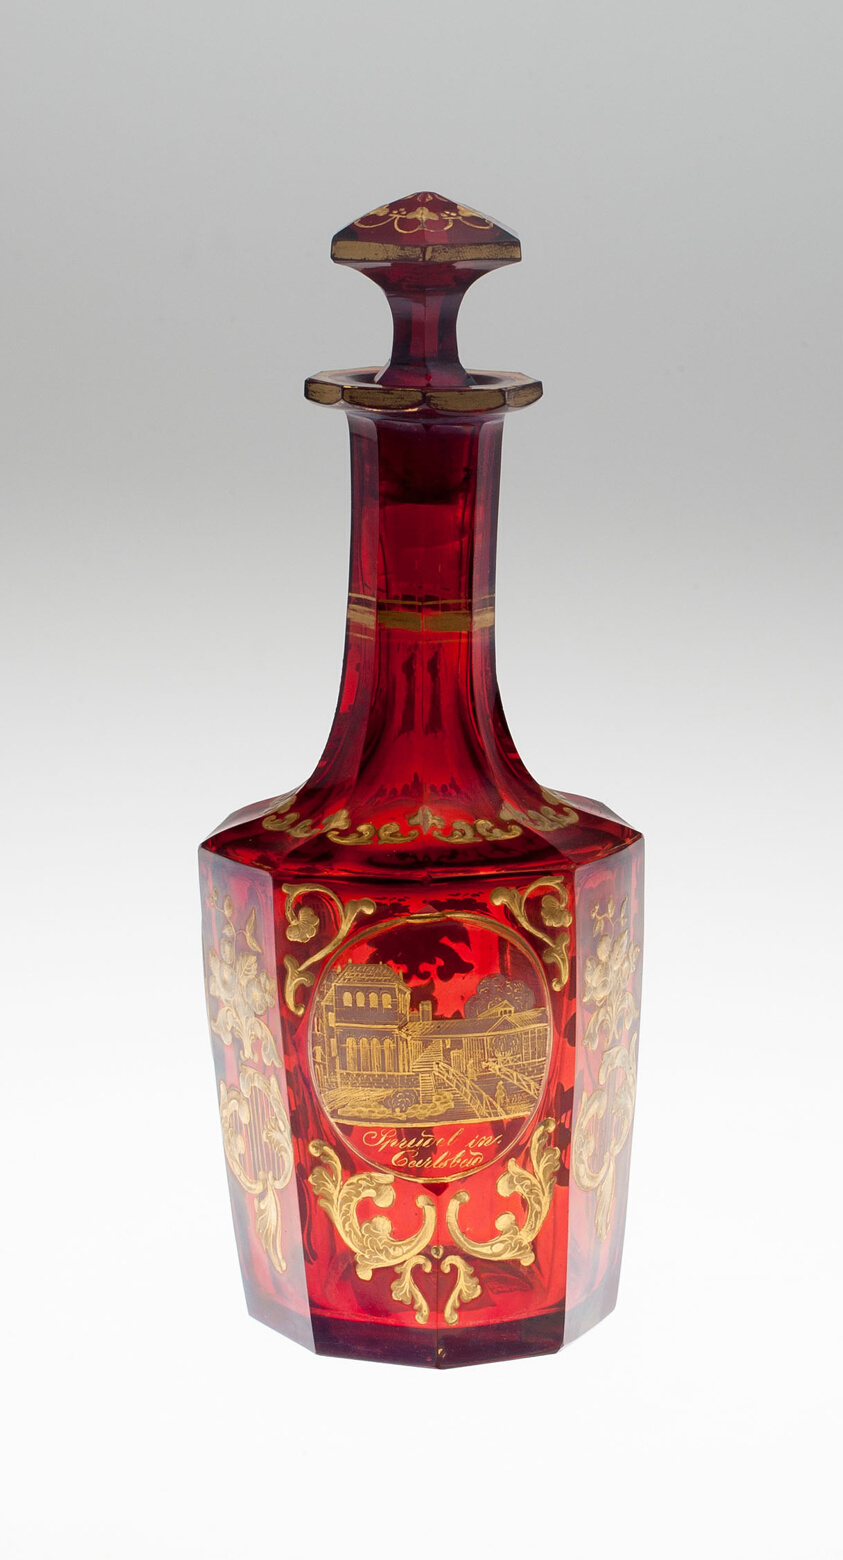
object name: Glass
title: Bottle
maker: Bohemia, Czech Republic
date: Late 19th century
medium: Ruby glass, cased in colorless glass; blown, tooled and, gilded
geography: Bohemia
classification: glass; european decorative arts